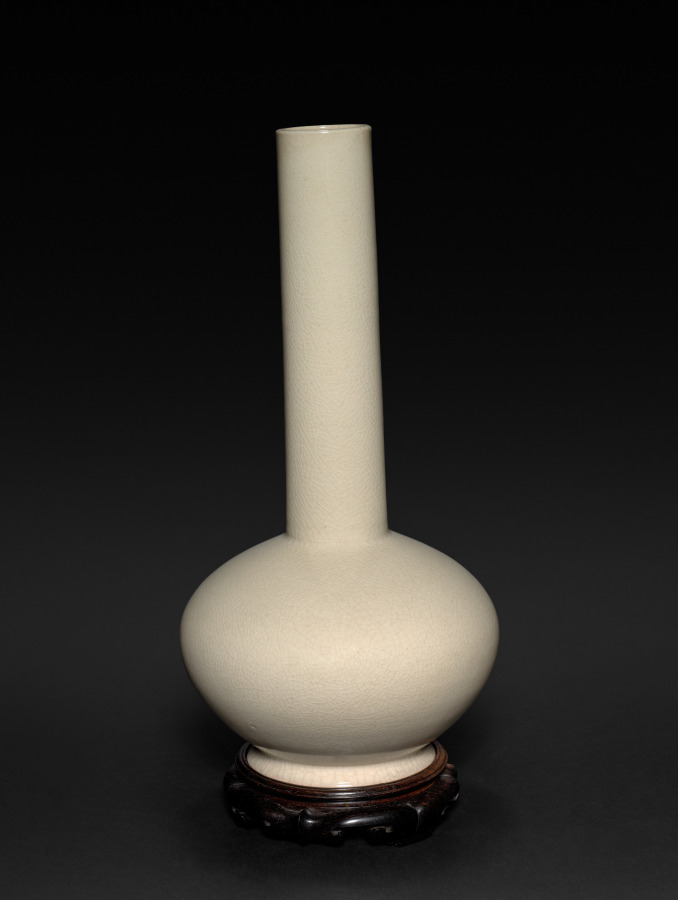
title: Long-Necked Vase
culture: Japan, Meiji period (1868–1912)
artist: Seifū Yohei III (Japanese, 1851–1914)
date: 1893–97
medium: Stoneware with crackled glaze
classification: Ceramic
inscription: 大日本清風造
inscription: 帝室技芸員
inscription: 清風盧人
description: The glazing of this long, narrow-necked and bulbous-based vase has a network of shallow cracks, created when the glaze fractured as it cooled from firing. It is called a cracked-ice pattern or glaze, since the effect resembles the surface of a frozen lake. The cracks here are of a consistently high density throughout the vessel. This pattern is observed also in the transparent glaze of some Kyoto ware, in some of Yohei III’s green glazes, and in some of his vessels emulating Chinese forms. The interior of the box lid has an attestation to its authenticity by Yohei IV, and the footring is inscribed Seifū of Great Japan (Dai Nihon Seifū) in iron black.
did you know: Seifū Yohei III apprenticed in the Seifū studio, married into the family, and later adopted the Seifū Yohei name, when he became head of the studio.